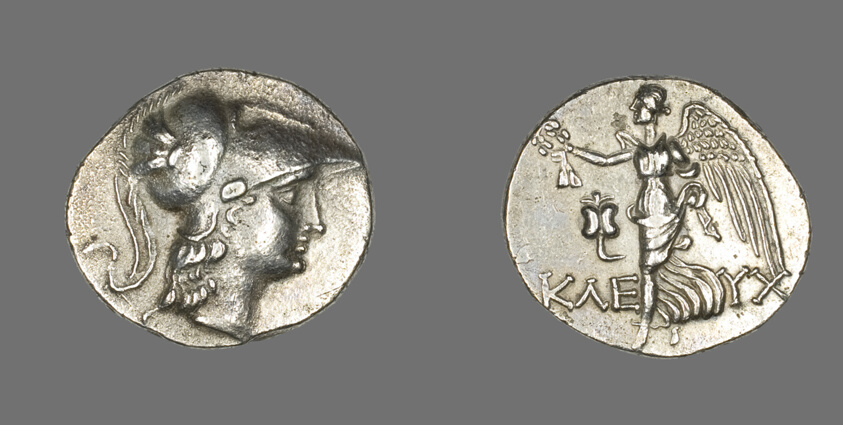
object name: Coin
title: Tetradrachm (Coin) Depicting the Goddess Athena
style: greek, ancient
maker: Greek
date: 190-36 BCE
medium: Silver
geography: Antalya Ili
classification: coin; ancient art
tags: mythological figures, goddesses